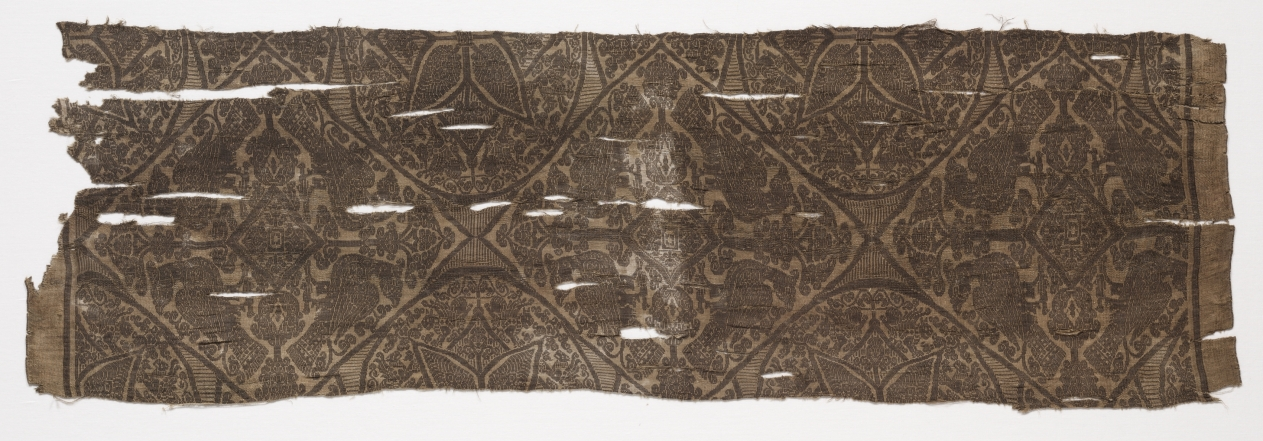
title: Fragment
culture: Iran or Iraq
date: 1420–1955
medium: compound twill weave, silk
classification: Textile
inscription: sana'ahu 'Ali bin Yusuf bin al-Marzuban al-...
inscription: li-yasta 'malhu al-amir al-ajall Qawam al-Mulk Abu 'Abd Allah 'Isa bin Ibrahim al-Harithi atala Allah fi al-m'ali baqa['a]hu wa-harasa fi iqtifa[']al-makarim fana['a]hu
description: The weave provides different design for each side. On the front, the overall lozenge pattern has alternating rows of ornamented ovals and diamonds. The large diamonds have a large four-leaved motif super-imposed over a diamond with trees in each corner. The foliate ground with four pairs of opposed griffins fills the interspaces to the oval border. The diamonds have two opposed pairs of birds each flanking a Tree of Life and standing on a plant motif; these enclose a smaller central diamond with trees in each corner and a central square. On the reverse, the plain ground of natural tan has two brown bands in large and small Kufic inscription.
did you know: The design is at right angles to warp.